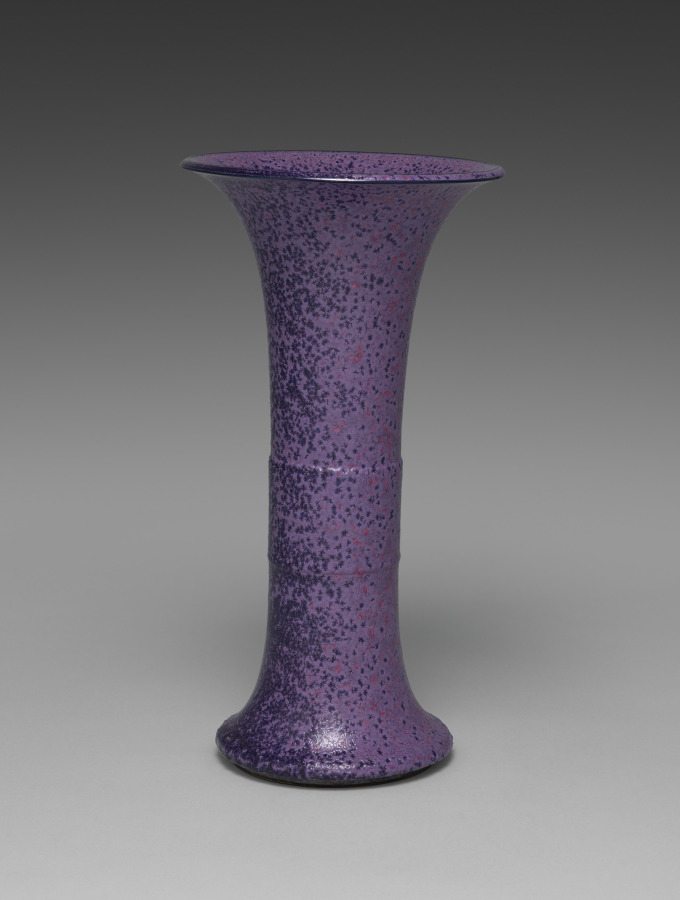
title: Gu-Shaped Vase with Patina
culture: Japan, Taishō period (1912–26) or Shōwa period (1926–89)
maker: Seifū Yohei IV (Japanese, 1872–1951)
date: 1914–46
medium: Porcelain with overglaze color enamel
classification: Ceramic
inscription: 清風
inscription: 成山清風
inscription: 清風造 【印】 清風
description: Yohei IV’s interest in bold, colorful designs is on full display in this purple gu-shaped vase. He not only exhibits his penchant for bold colors but also shows off a complex surface that suggests the patina on an ancient bronze. The body of the vase is a dark, greenish blue over which there is a thick application of color. While the predominant overlaid color is lavender purple, salmon pink and cornflower blue appear in places along with myriad nearly black forms, perhaps floating dandelion seeds or tiny flowers, scattered over the surface.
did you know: The glaze recalls in some respects a Chinese glaze named “snowflake blue,” or xuehualan (Japanese sekka’ai), a low-fired lead-fluxed glaze.